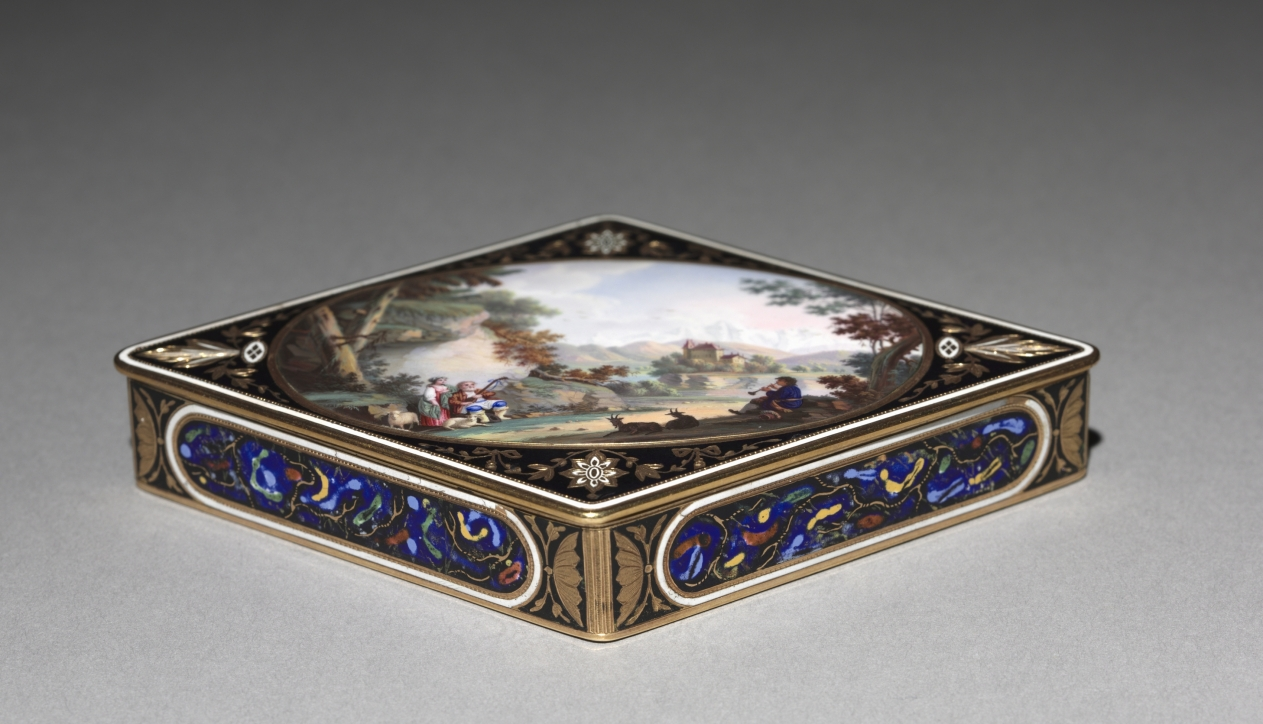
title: Box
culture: Switzerland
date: early 1800s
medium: gold and enamel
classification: Enamel